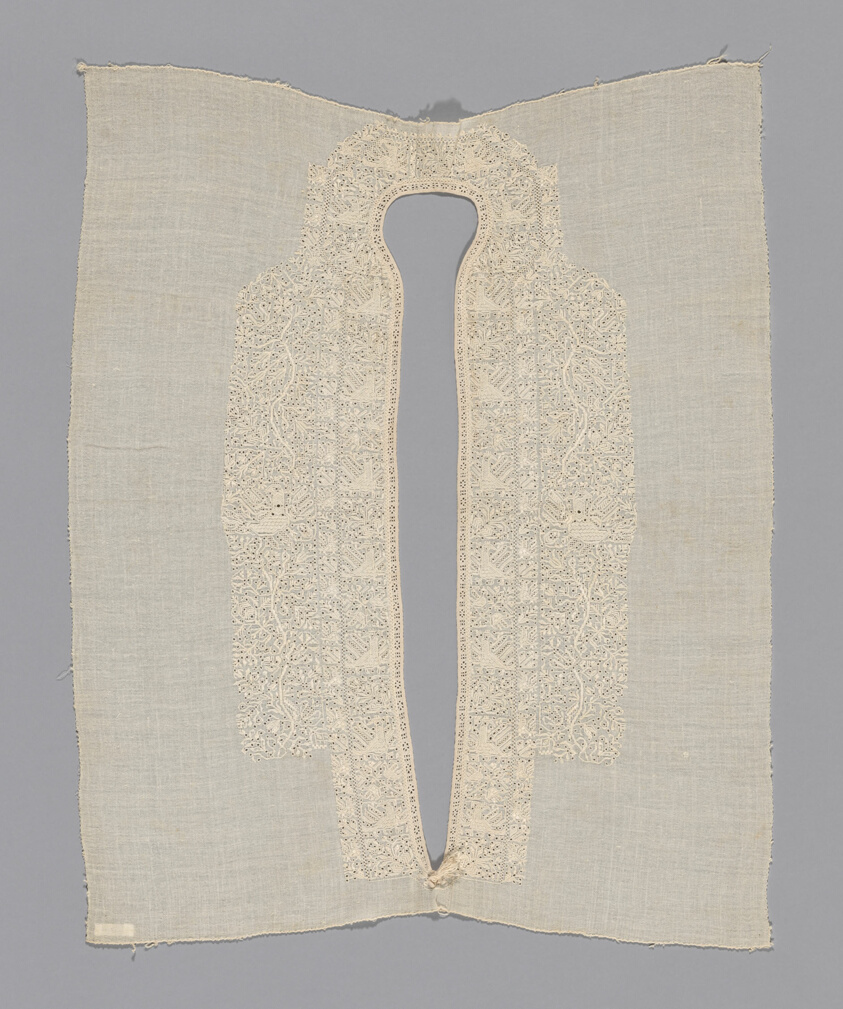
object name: Textile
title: Neck Insert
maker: Greece, Ionian Islands, Leukas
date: 18th century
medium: Linen, plain weave; embroidered in eyelet hole, hem, overcast, and satin stitches; insets of linen, needle lace; edged with linen, twill oblique interlacing tape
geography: Levkás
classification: textile; needlework (visual works)